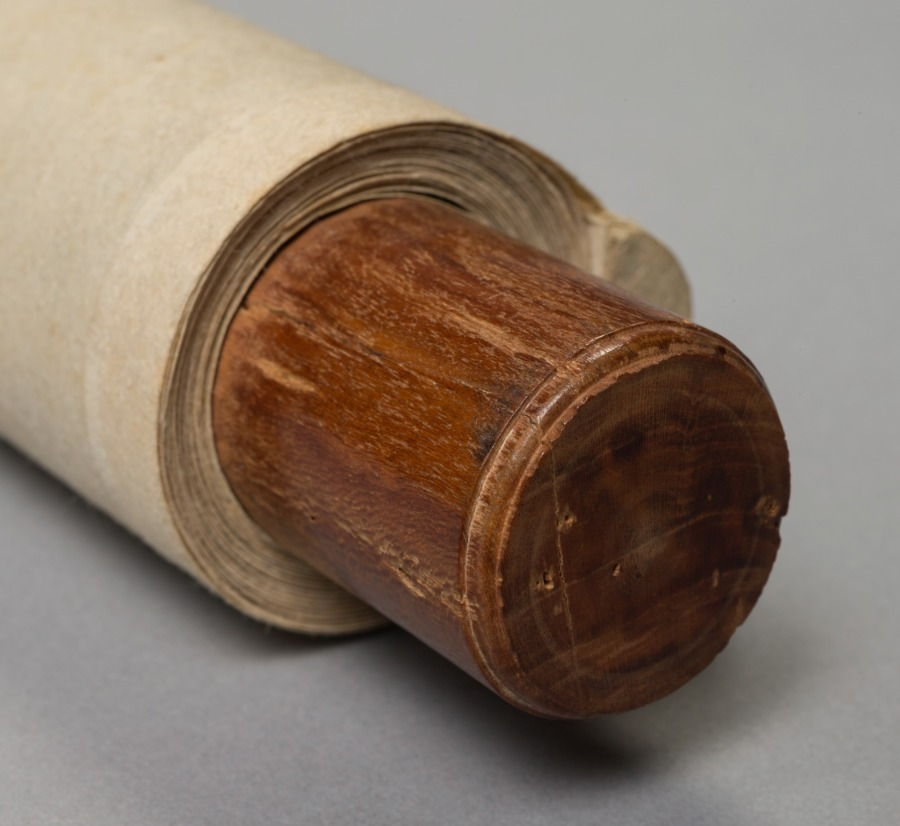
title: Casually Created on a Spring Day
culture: Japan, Edo period (1615–1868) to Meiji period (1868–1912)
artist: Murase Taiitsu (Japanese, 1803–1881)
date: c. 1825–81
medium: hanging scroll; ink on paper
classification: Painting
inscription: artist's inscription, signature, and seal at top of painting.